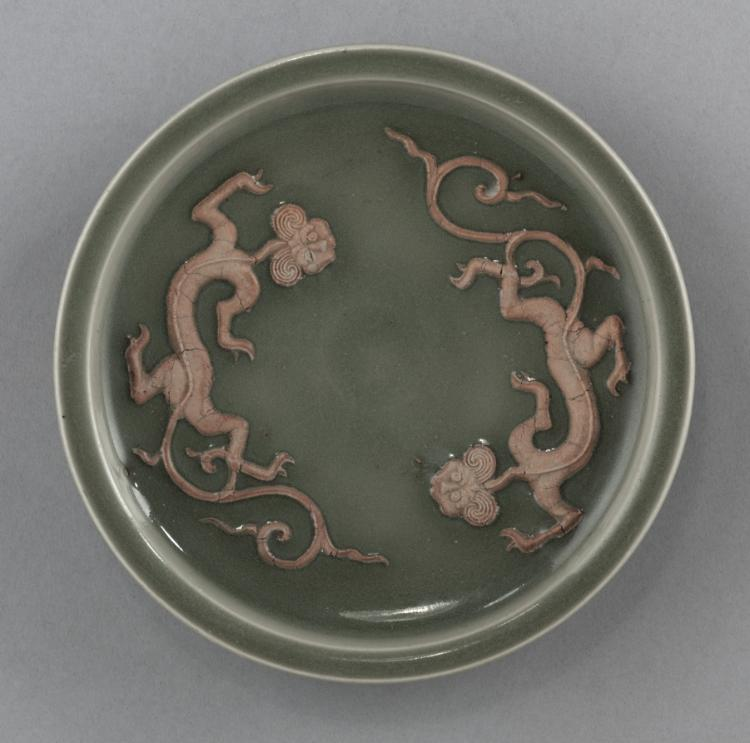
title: Dish with Two Dragons in Relief: Longquan Ware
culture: China, Zhejiang province, Yuan dynasty (1271-1368)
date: 14th Century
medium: glazed porcelain with unglazed molded decoration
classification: Ceramic